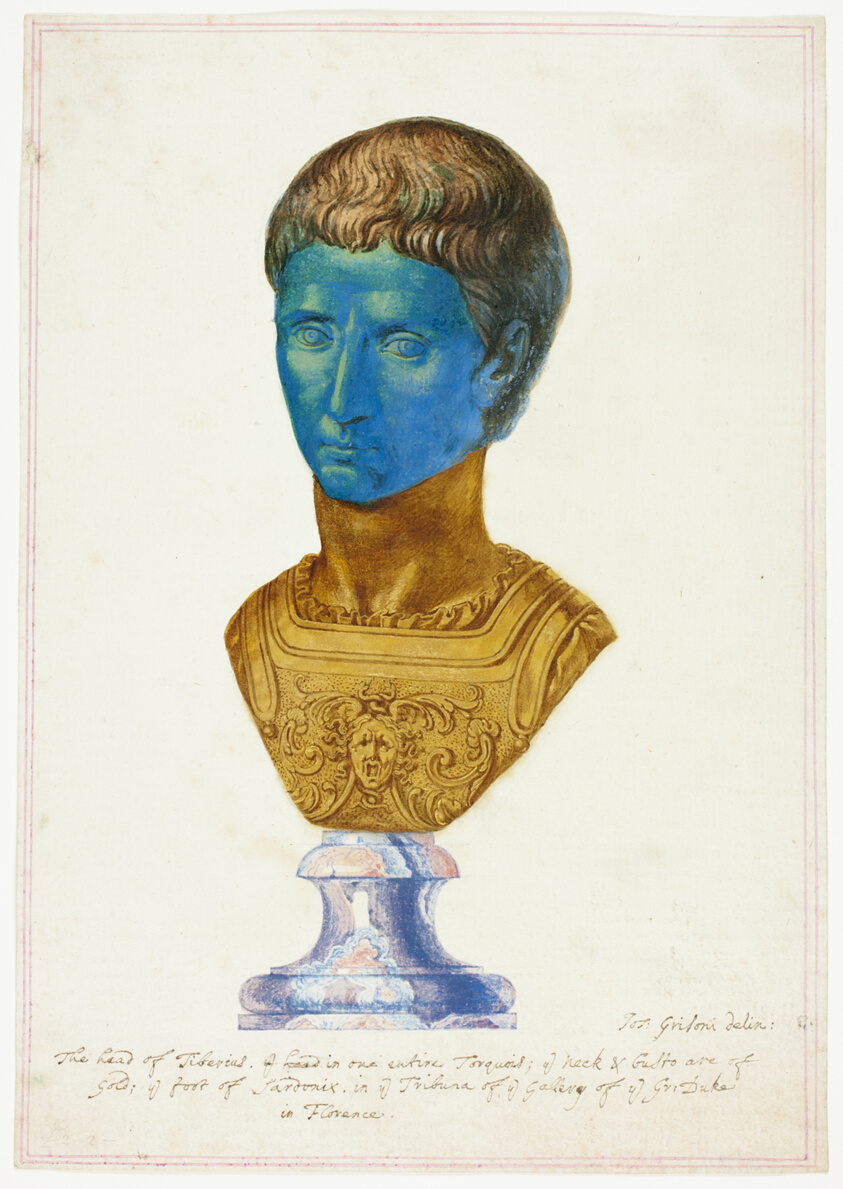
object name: Drawing and Watercolor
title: Head of Tiberius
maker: Giuseppe Grisoni (Italian, born Flanders, 1699-1769)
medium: Gouache, heightened with gold paint, over black chalk, on ivory laid paper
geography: Italy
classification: watercolor; drawings (visual works); prints and drawing